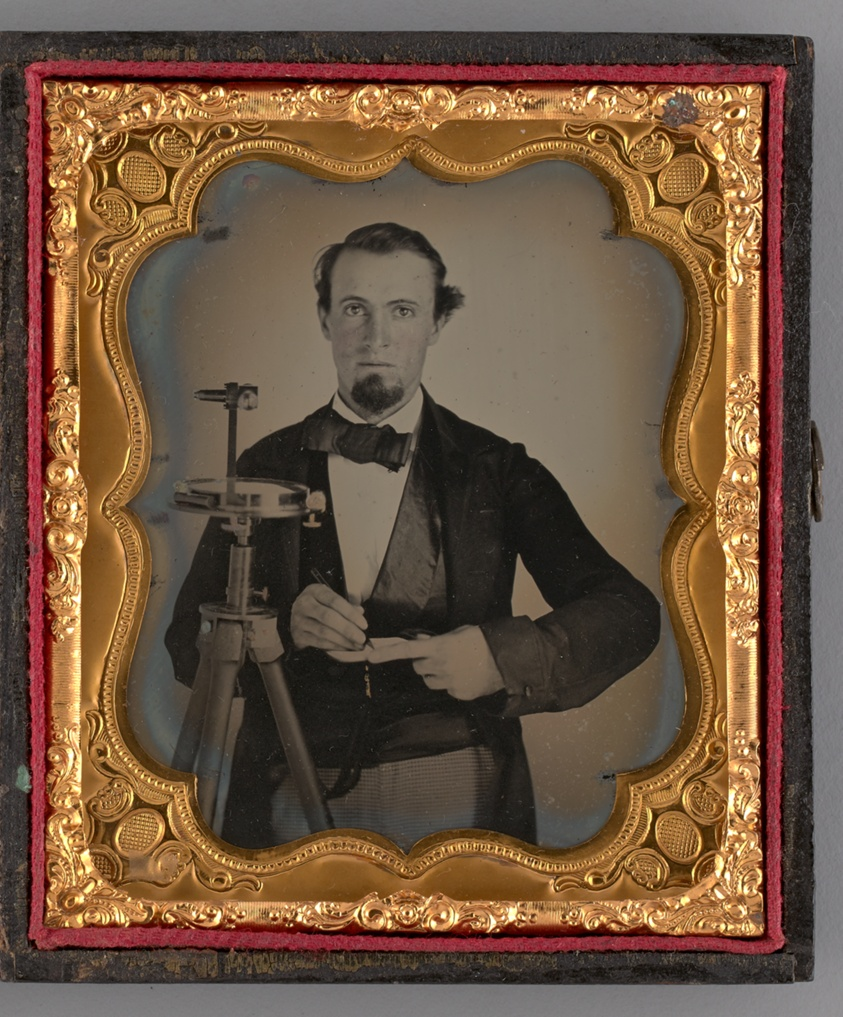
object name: Photograph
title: Untitled (Portrait of a Standing Man with a Sextant)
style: 19th century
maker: Unknown maker; American, 19th century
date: 1865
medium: Ambrotype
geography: United States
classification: portrait; ambrotype; portrait; photograph; photographic process; photography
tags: lundberg collection, portraits: male subject, portraits, portrait, people, Male, men